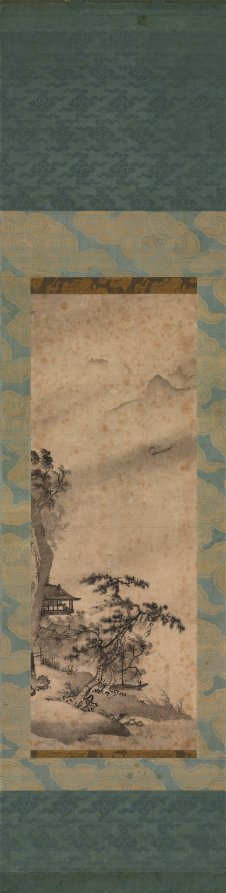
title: Windy Landscape with Sailboat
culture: Japan, Muromachi period (1392–1573)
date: mid-1400s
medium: hanging scroll; ink on paper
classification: Painting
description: Windy Landscape depicts the humble waterside retreat of an official retired from government service. For government officials, retreating from the city to a remote locale was the ideal retirement, though difficult to attain. In this scroll the retiree gazes out over the watery expanse past the sailboat to the mist-covered mountain in the far distance. The artist has achieved this depth of composition through carefully placed brushstrokes and ink washes.